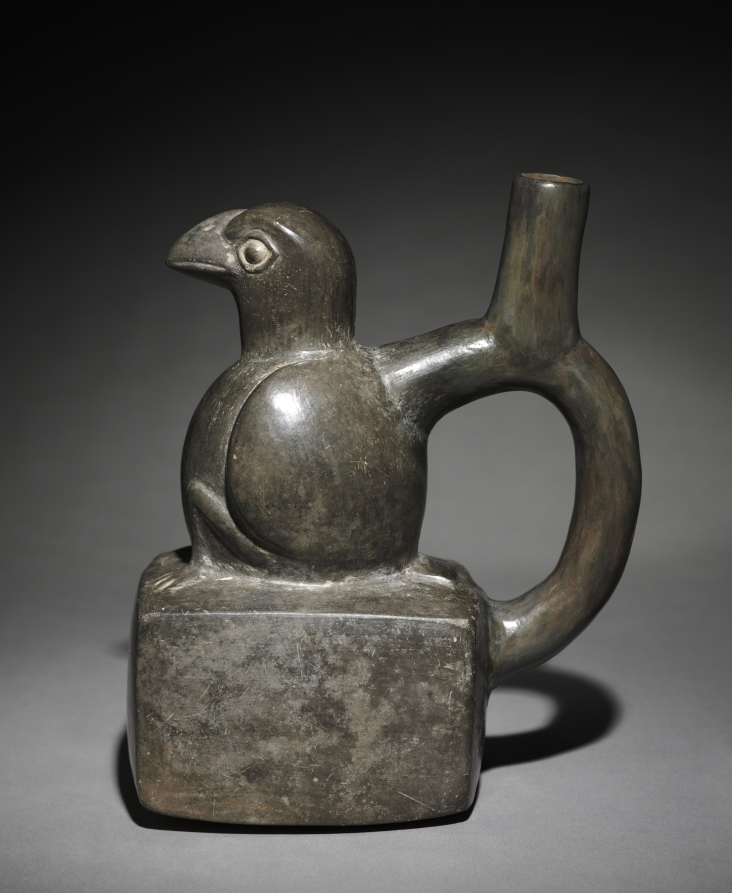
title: Darkware Vessel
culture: Peru, North Coast, Chimú style (900-1470)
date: 900–1470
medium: black ware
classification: Ceramic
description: Under the Chimú, ceramic seems to have been a less important artistic medium than for earlier north coast cultures. Accordingly, ceramics were mass produced with molds and, rather than bearing painted scenes, often have an overall dark surface achieved by firing in a smoky atmosphere.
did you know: Chimú potters fired their vessels in a reduced-oxygen atmosphere to achieve a uniform black surface.